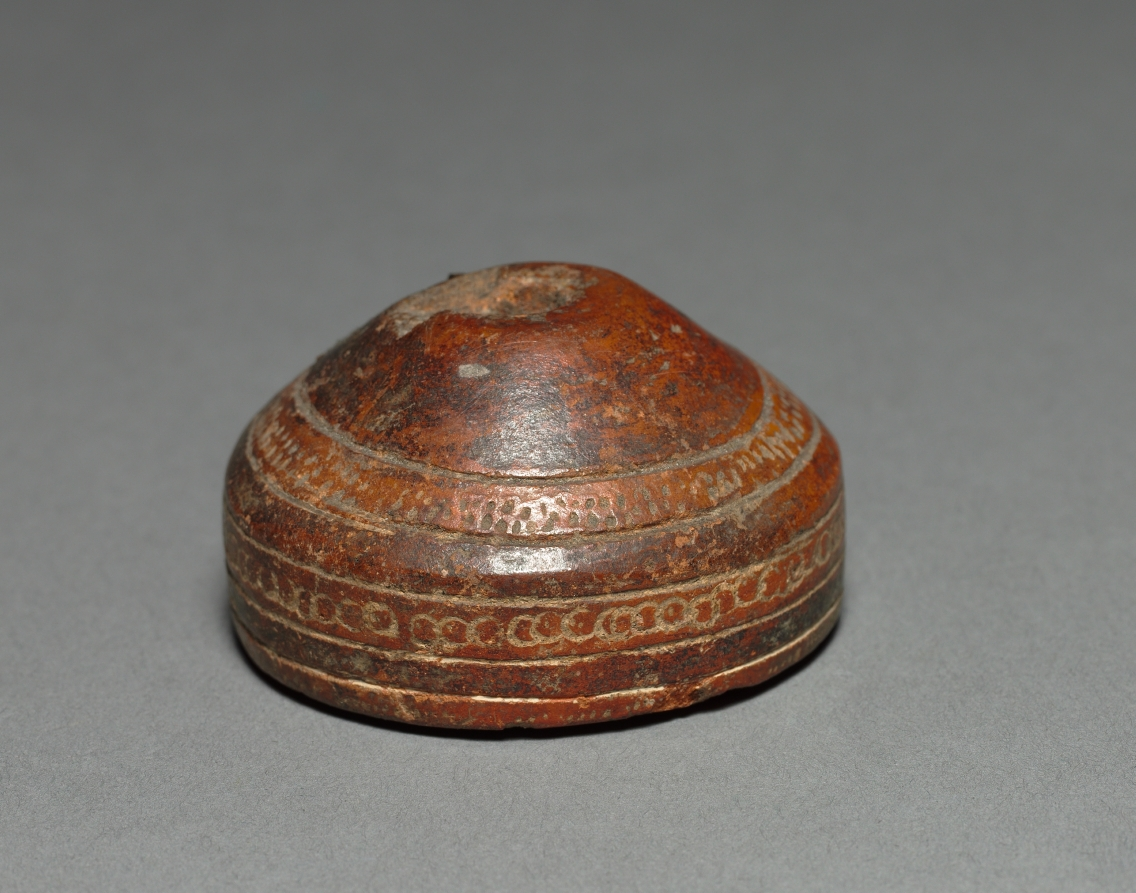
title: Spinning Whorl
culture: Colombia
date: before 1550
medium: red ware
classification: Ceramic